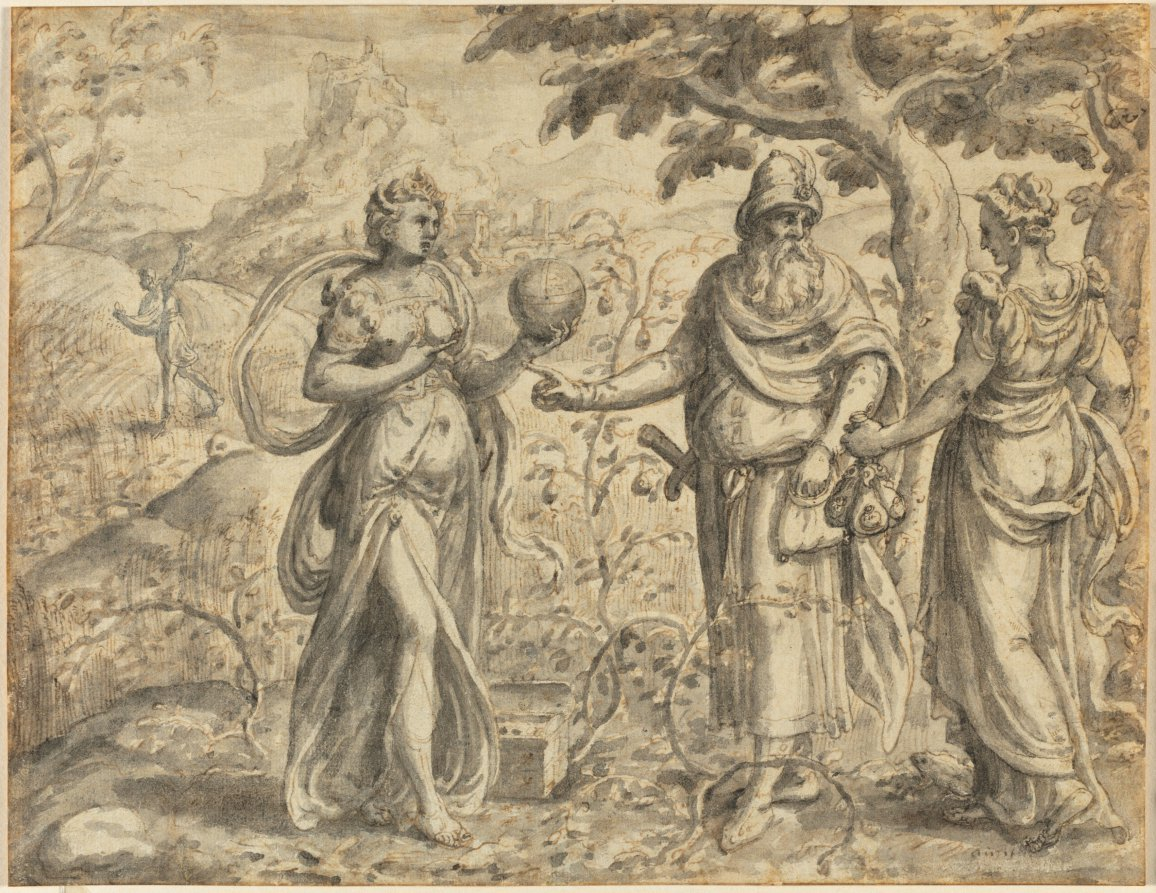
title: The Seed Received among the Thorns, from the Parable of the Sower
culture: Belgium, Flanders, Antwerp, 16th century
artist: Gerard P. van Groningen (Netherlandish, active late 1500s)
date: c. 1573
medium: Black chalk, gray wash, and brown ink, on cream laid paper; traces of transfer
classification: Drawing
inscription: inscribed lower right in brown ink: "avarita"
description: This design for a print is from a suite portraying the biblical parable of the sower. The parable compares types of soil to people in the world: one hardened; one fickle; one distracted by things of the world; and one with an open heart, ready to accept God. The third sower (here, a pilgrim) distractedly throws his seeds among thorns. He is surrounded by two female personifications—Cares of the World, and Avarice (extreme greed for money). Behind them, the fourth sower successfully plants his crop. The content and its presentation exemplify the instructive tone of the period’s moral discourse.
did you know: The stage-like format of this drawing recalls enacted "plays of meaning," or moralizing plays, performed in the Netherlands at the time.